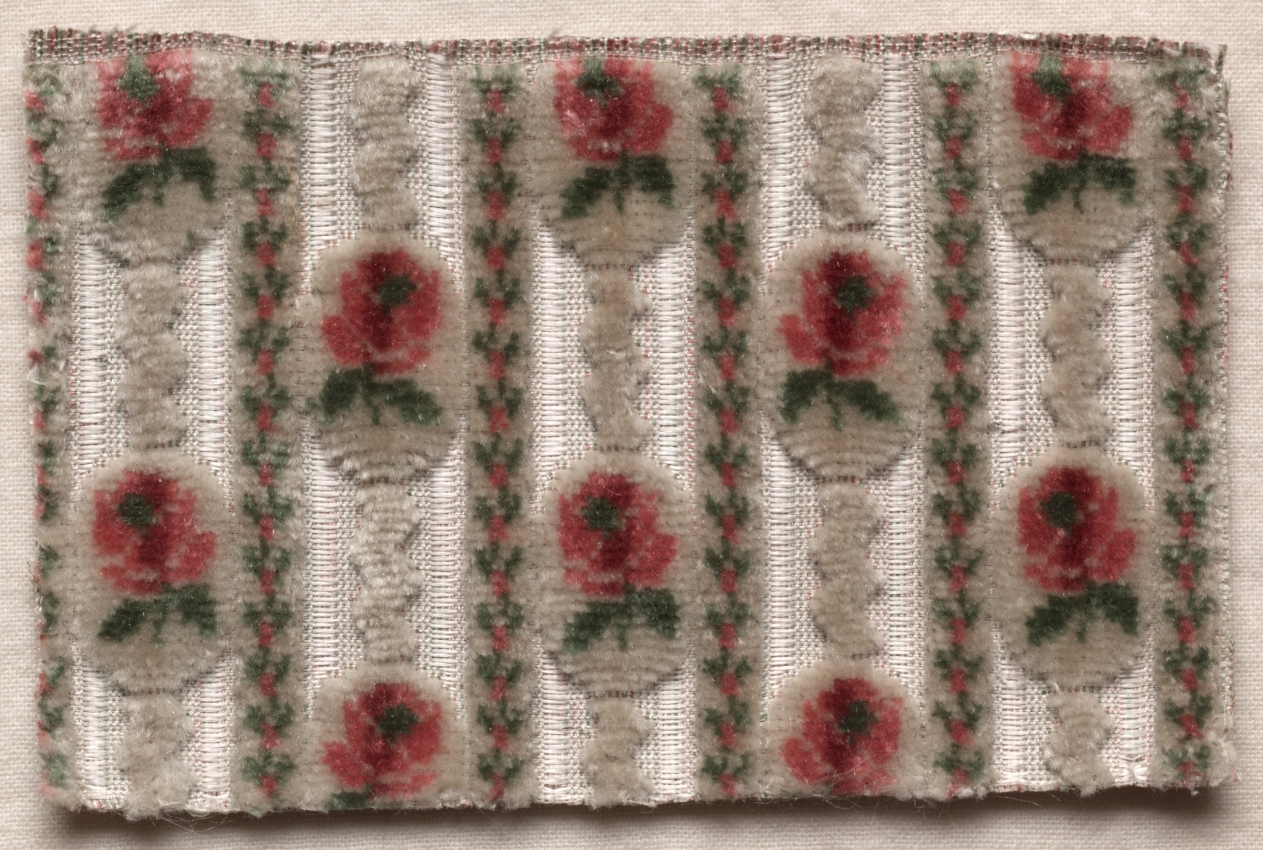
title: Textile Fragment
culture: France, 18th century, Period of Louis XVI (1774-1793)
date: 1774–1793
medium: velvet (cut and voided); silk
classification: Velvet